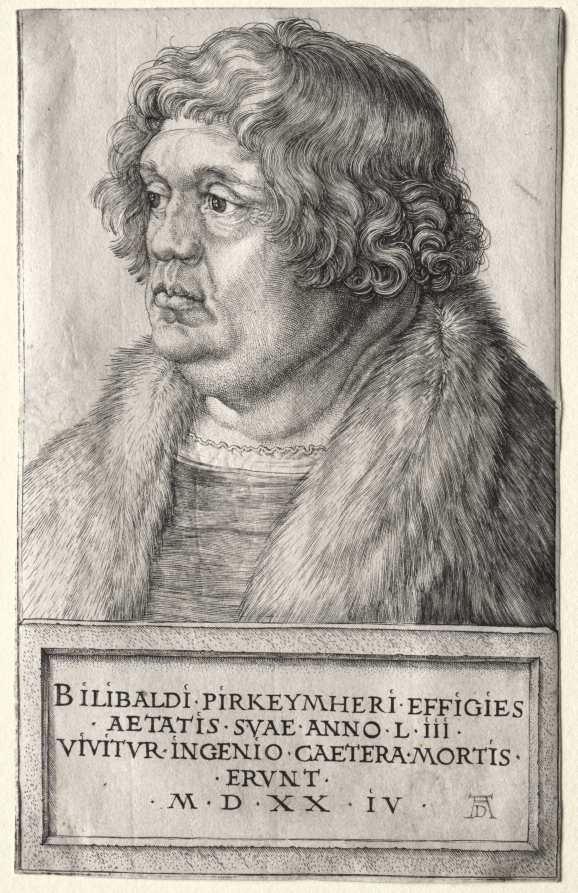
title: Willibald Pirkheimer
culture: Germany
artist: Albrecht Dürer (German, 1471–1528)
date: 1524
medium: engraving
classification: Print